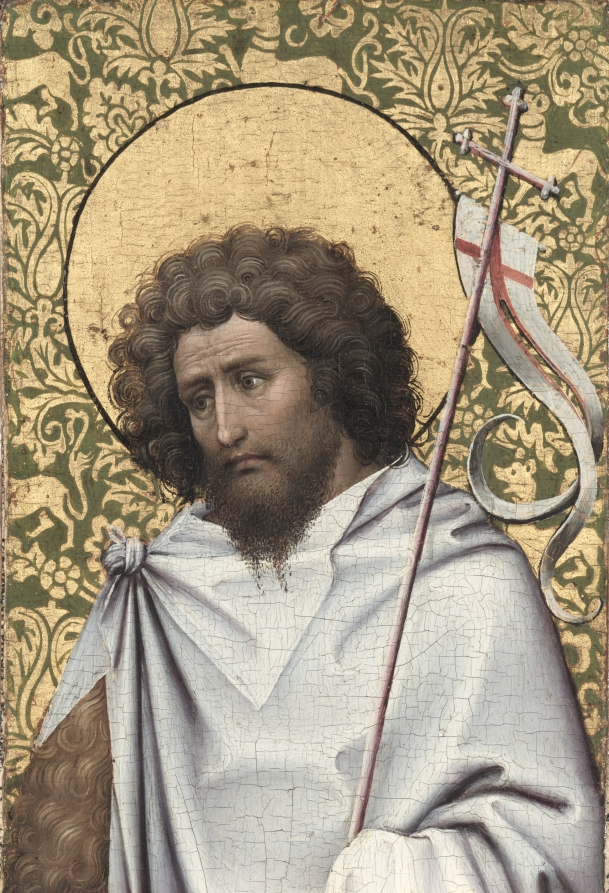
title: John the Baptist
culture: Flanders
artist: Robert Campin (Netherlandish, 1375/79–1444)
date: c. 1410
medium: oil on oak panel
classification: Painting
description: According to tradition, John the Baptist wears a hair shirt under a white cloth, associated with newly baptized Christians. The flag bearing a red cross symbolizes resurrection. In marked contrast, the background features a lavish gold-patterned silk. The display of such luxurious fabrics continues an ancient tradition of using the finest objects in the worship of God. This painting has been cut down along the lower edge and would have originally shown a full-length image of the saint. It was probably the right wing of a triptych, with John the Baptist gazing upon a central image of the Virgin and Child. Campin first settled in Tournai around 1405-6 as a free master of the guild of painters, and he bought citizenship there in 1410, which suggests he was born elsewhere. Although heavily indebted to contemporary masters of manuscript illumination, Campin displayed greater powers of realistic observation than any other painter before him. He was one of the first artists to experiment with the use of oil-based colors, in lieu of egg-based tempera, to achieve the brilliant color typical of this period.